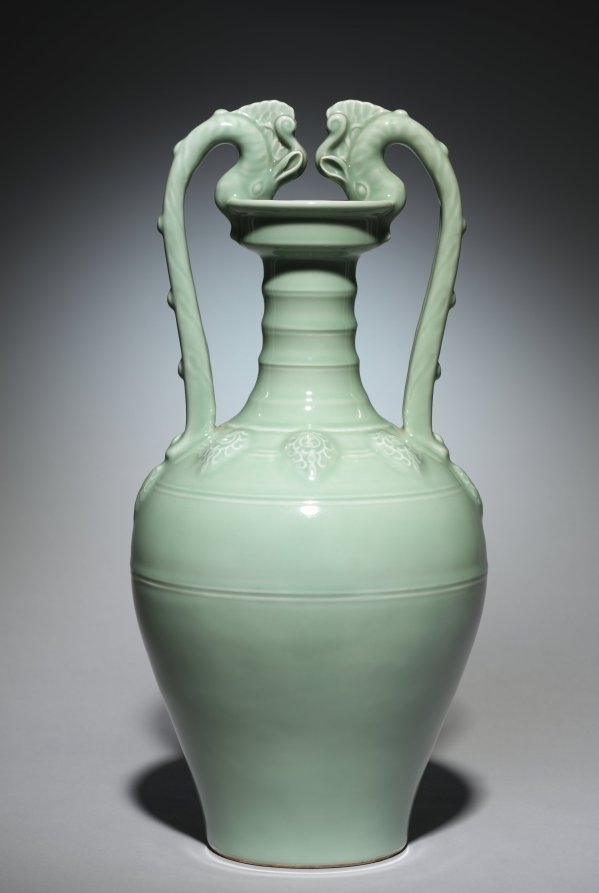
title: Amphora Vase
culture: China, Jiangxi province, Jingdezhen, Qing dynasty (1644-1911), Yongzheng mark and period (1723-35)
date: 1723–35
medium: porcelain with celadon glaze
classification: Ceramic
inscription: Yongzheng mark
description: This elegant vase, modeled in the shape of an amphora with dragon handles has perfect symmetry. Its celadon glaze is of exceptional purity and of subtle green color, all characteristics of classical Yongzheng-era monochrome porcelains. The amphora shape and dragon handles of this vase, seen earlier in the glazed stoneware of the Sui and Tang dynasties (581-907), were revived during the Yongzheng period for achieving "antique-elegance" (guya) in aesthetics as well as technical perfection in ceramic art. Only four vases of this size and glaze are known to exist.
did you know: The shape of the vase derives from Greece and was introduced to China via the Middle East.